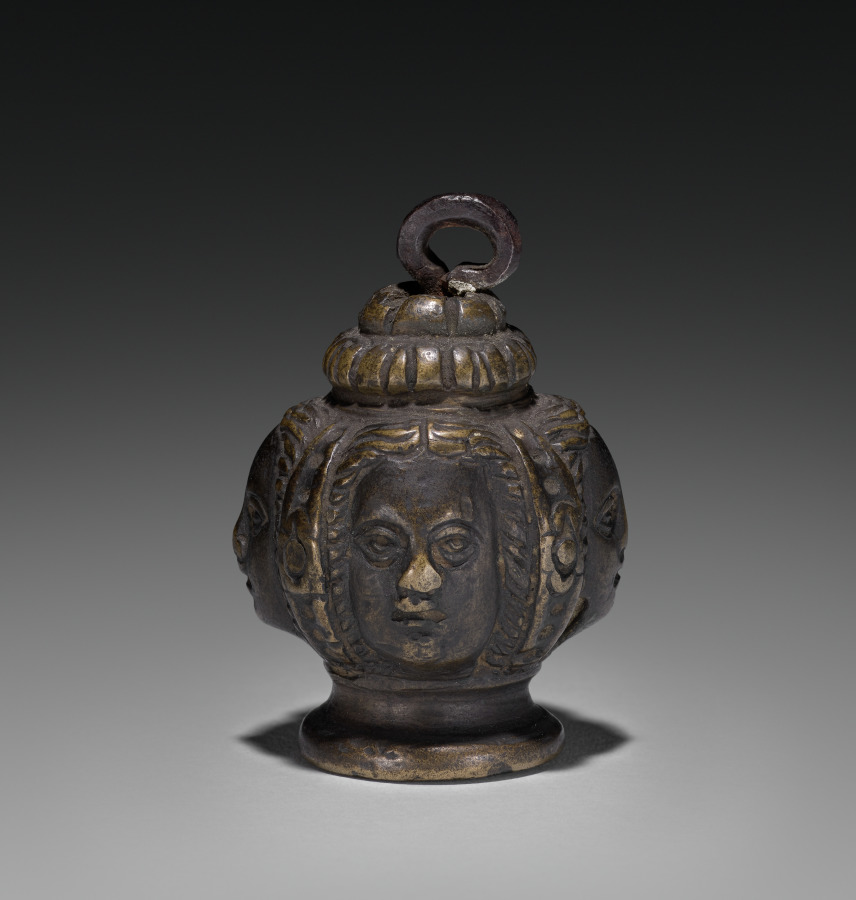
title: Decorative Finial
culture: Italian or French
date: 1800s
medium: brass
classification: Arms and Armor